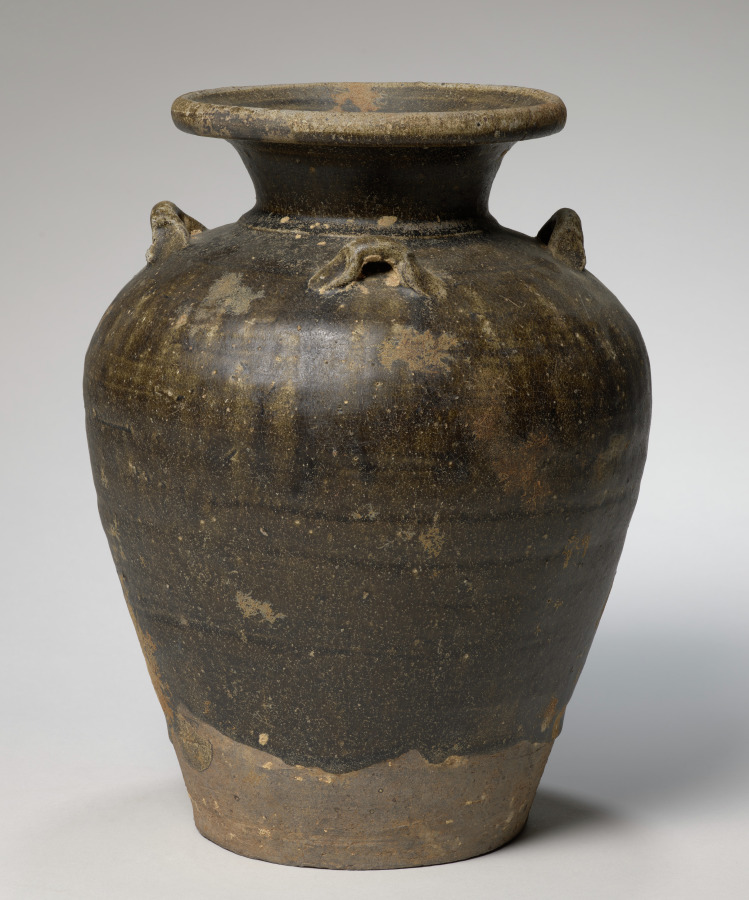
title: Storage Jar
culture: Thailand, Sawankhalok, 14th century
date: 1300s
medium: stoneware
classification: Ceramic